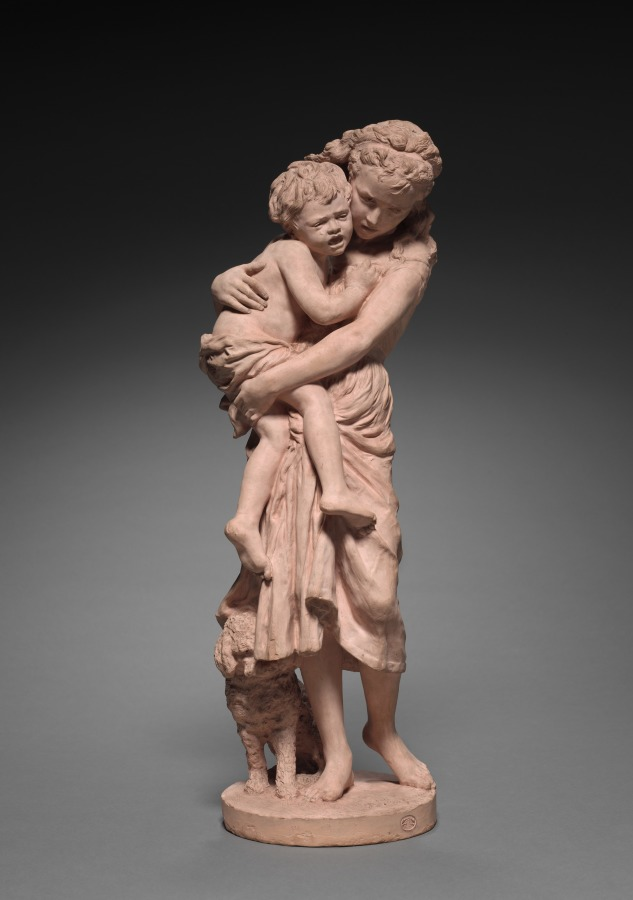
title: Brother and Sister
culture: France, 19th century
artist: Jean-Baptiste Carpeaux (French, 1827–1875)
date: 1875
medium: terracotta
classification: Sculpture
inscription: Signed "JBT" Carpeaux/1875" upper surface of base.